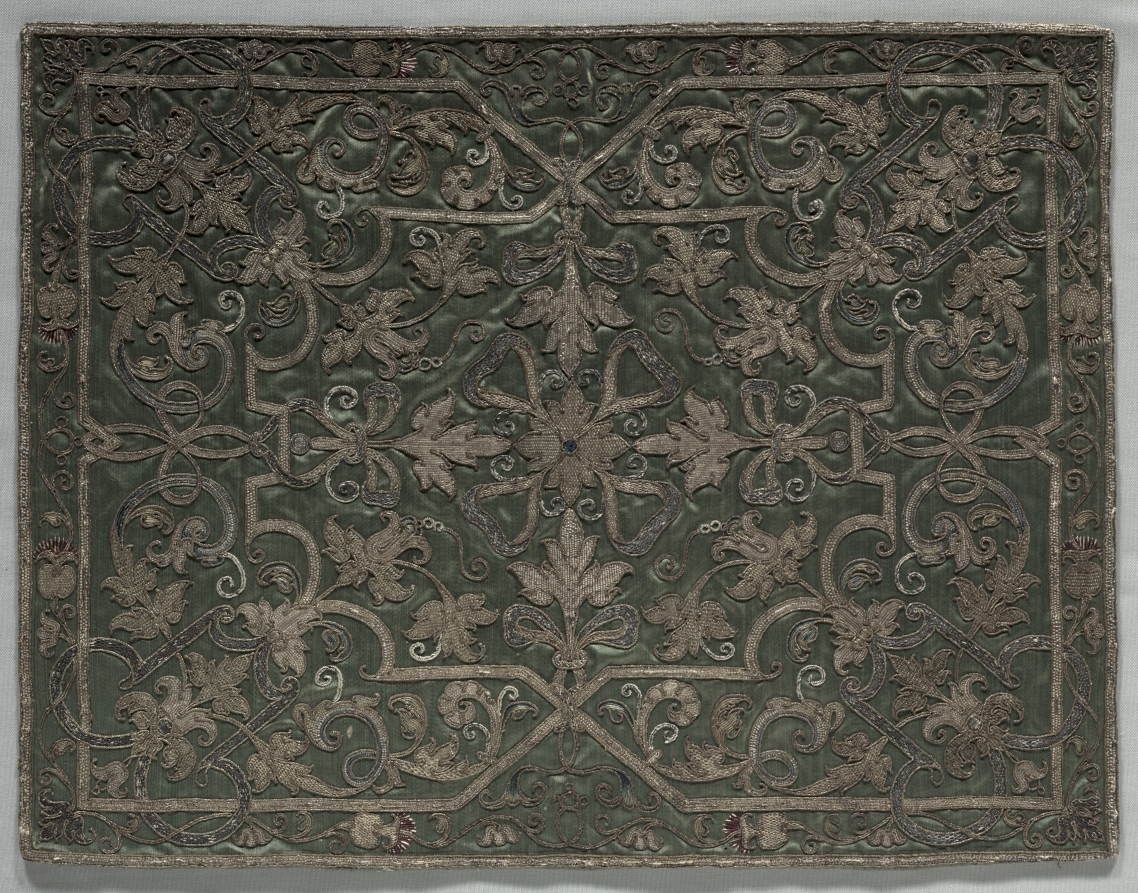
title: Apparel from a Dalmatic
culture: Italy, early 16th century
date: early 1500s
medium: embroidery; silk and metallic threads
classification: Embroidery